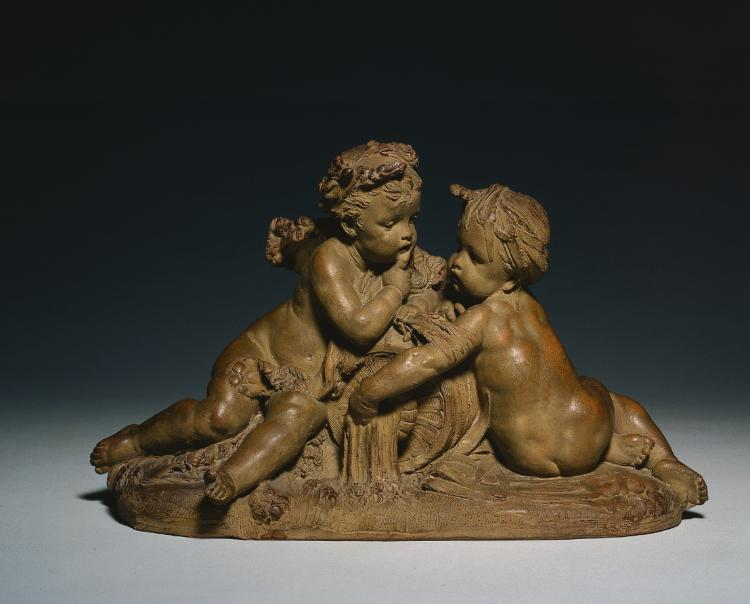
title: Putti Representing Earth and Water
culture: France, 19th century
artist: Albert-Ernest Carrier-Belleuse (French, 1824–1887)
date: 1865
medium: terracotta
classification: Sculpture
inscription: Signed near right corner: "A. Carrier (letter 'E' smeared)"; inscribed in pencil on upper surface of wooden base: "#2268" and "Henschel"; inscribed in pencil on bottom of wood base: "2268" and "Made-in-France"